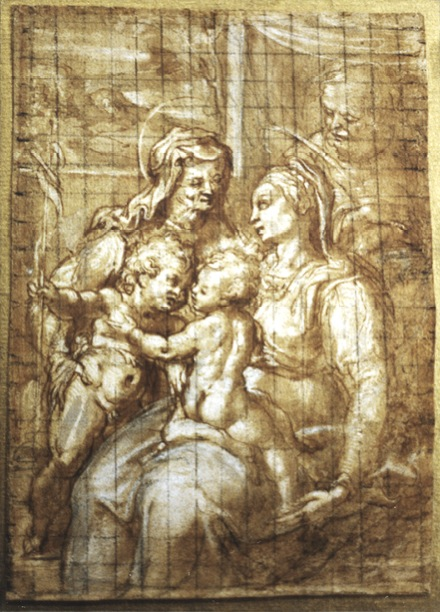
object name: Drawing and Watercolor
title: The Holy Family with Saint John the Baptist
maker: Follower of Federico Barocci (Italian, 1528–1612)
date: 1570/80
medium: Pen and brown ink, with brush and brown and gray wash, heightened with white chalk, on cream laid paper, squared in black chalk, laid down on off-white Japanese paper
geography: Italy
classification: drawings (visual works); paper; prints and drawing